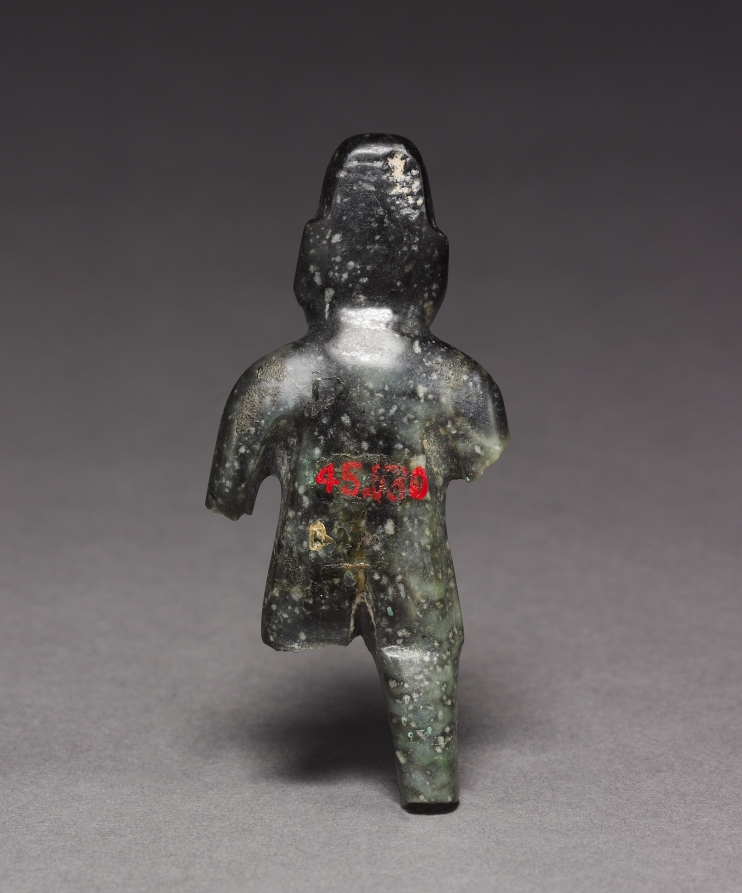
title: Figurine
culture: Mesoamerica, Mexico, Olmec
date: 1200–300 BCE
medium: jadeite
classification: Jade